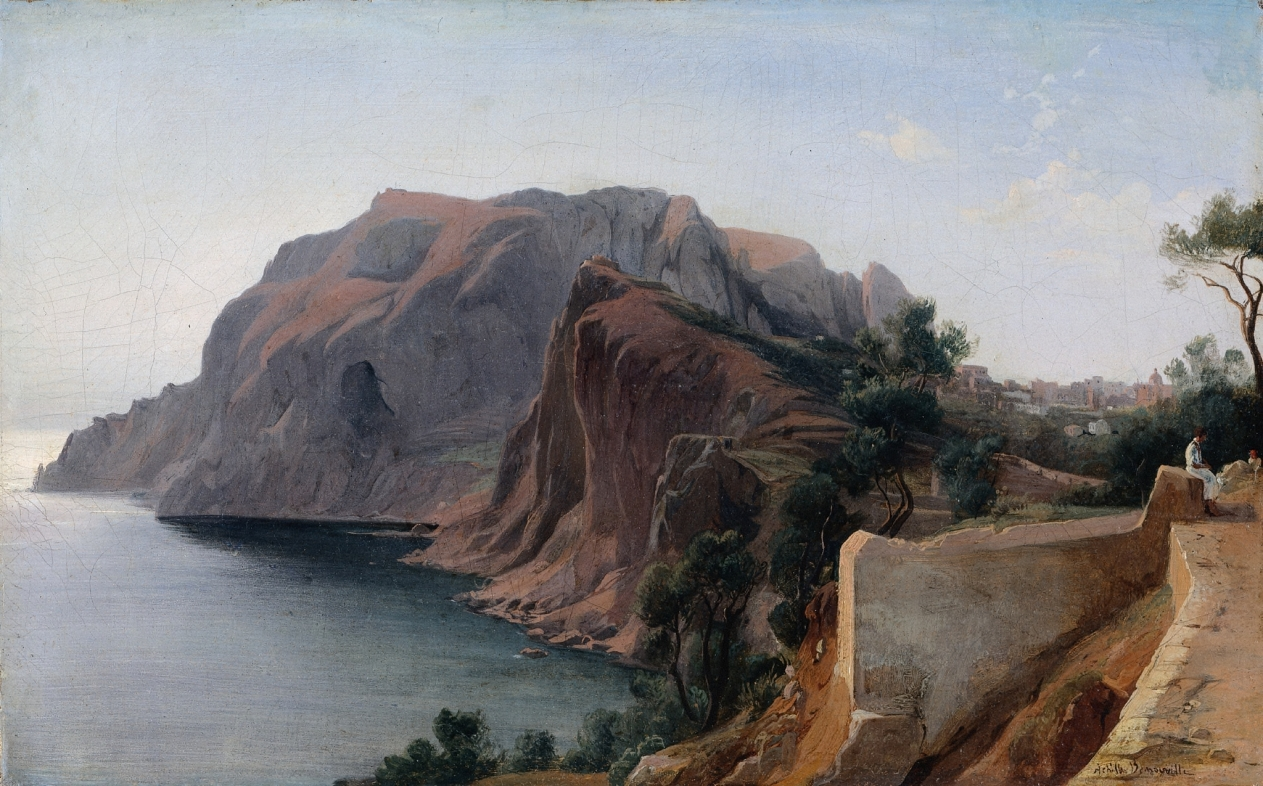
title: Capri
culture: France, 19th century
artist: Jean Achille Benouville (French, 1815–1891)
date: c. 1845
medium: oil on fabric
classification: Painting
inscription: Signed lower right: Achille Benouville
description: Located in the Mediterrean Sea, south of Rome, the island of Capri has been famous since Roman times for its spectacular scenery and mild climate. In the 19th century it became the home of many European nobles, and attracted artists from across the continent. Here Benouville captured the beauty of the island's rocky coastline, focusing his attention on a path leading toward the city of Capri and past the rocky outcropping of Monte Solaro. Fascinated by the Italian landscape, Benouville spent years in Italy drawing and painting the countryside. From 1838 to 1845 he made at least three trips there, and in 1845, after winning the Prix de Rome—a fellowship allowing promising artists to study in that city—he spent much of the next 25 years in Italy. Although trained to paint landscapes in a very formal manner, after leaving France Benouville began to paint his subjects with a much more personal, nontraditional approach. This may account for this picture's unusual composition, in which much of the canvas is given to indistinct but beautifully painted stone, sky, and water.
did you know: A pair of figures rest on the right side of the composition—both in white garments, taking in the refreshing scent of the sea air.